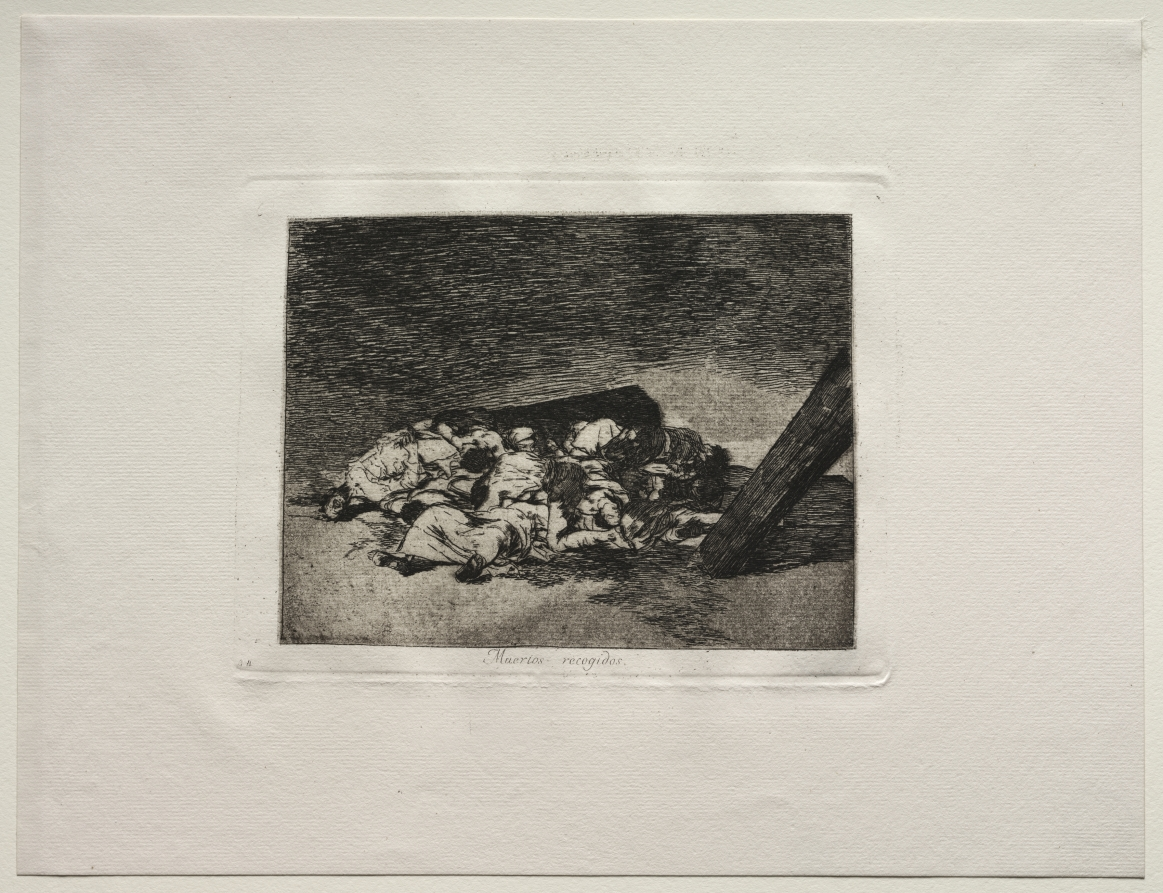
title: The Horrors of War: Harvest of the Dead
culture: Spain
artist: Francisco de Goya (Spanish, 1746–1828)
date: c. 1810–20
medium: etching and aquatint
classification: Print